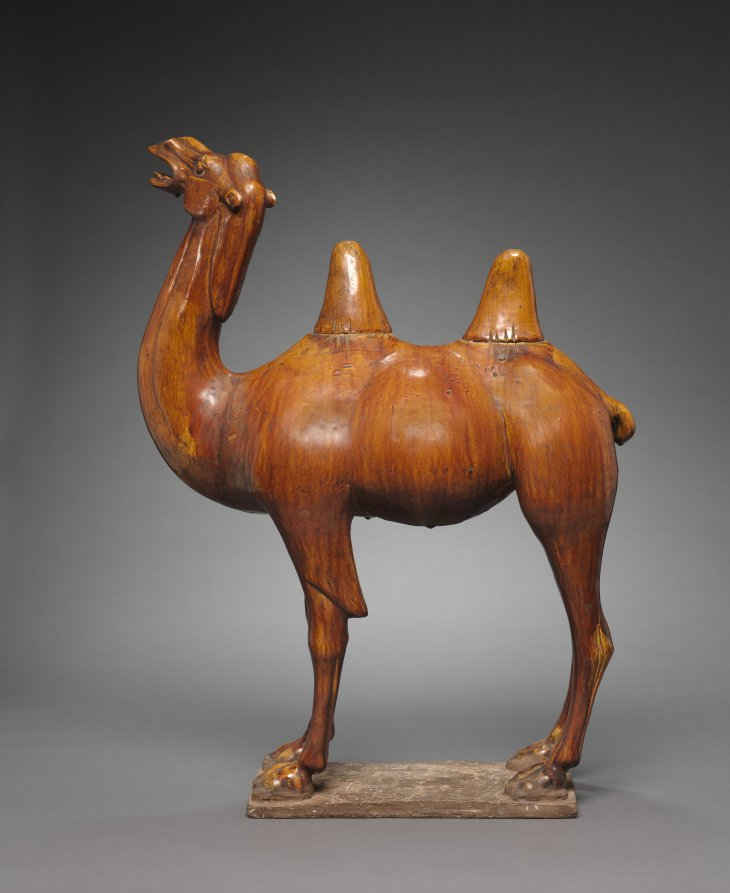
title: Camel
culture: China, Tang dynasty (618-907)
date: 700s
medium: glazed earthenware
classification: Sculpture